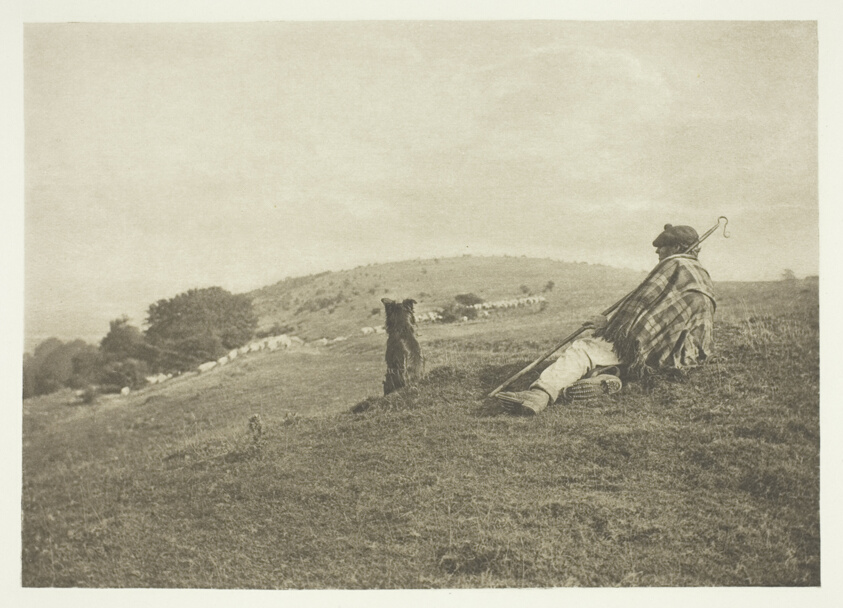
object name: Photograph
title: A Pastoral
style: 19th century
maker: B. Gay Wilkinson (English, 1857–1927)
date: 1880/90, printed January 1891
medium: Photogravure, from "Sun Artists, Number 6" (1891)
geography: England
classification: photogravure; photomechanical process; photography; photograph